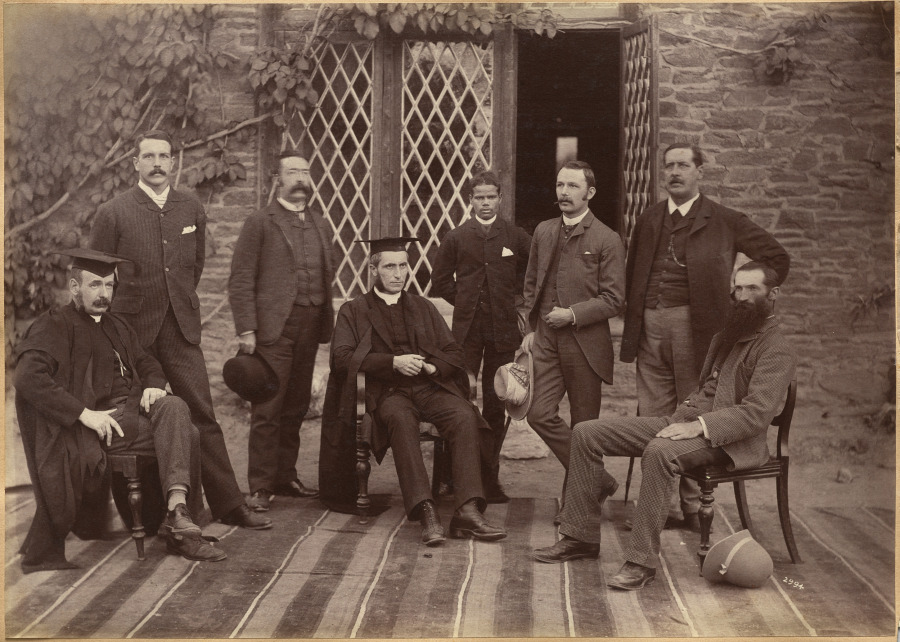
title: Principal and Teachers of Bishop Cotton School, Shimla (recto)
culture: India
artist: Raja Deen Dayal (Indian, 1844–1905)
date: c. 1882–87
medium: albumen print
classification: Photograph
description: These photographs are part of an album, now disassembled, of around 105 photographs taken in India between 1885 and summer 1887 that provide glimpses into the lives of the British colonial elite and royal and upper-class Indians. The museum holds another group of 37 pictures from this album (2016.266), which was probably commissioned by a British civil servant visiting or working in India around 1888 as a personal souvenir of his experiences there.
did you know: Raja Deen Dayal is regarded now, and was considered during his lifetime, to be India’s most important 19th-century photographer.